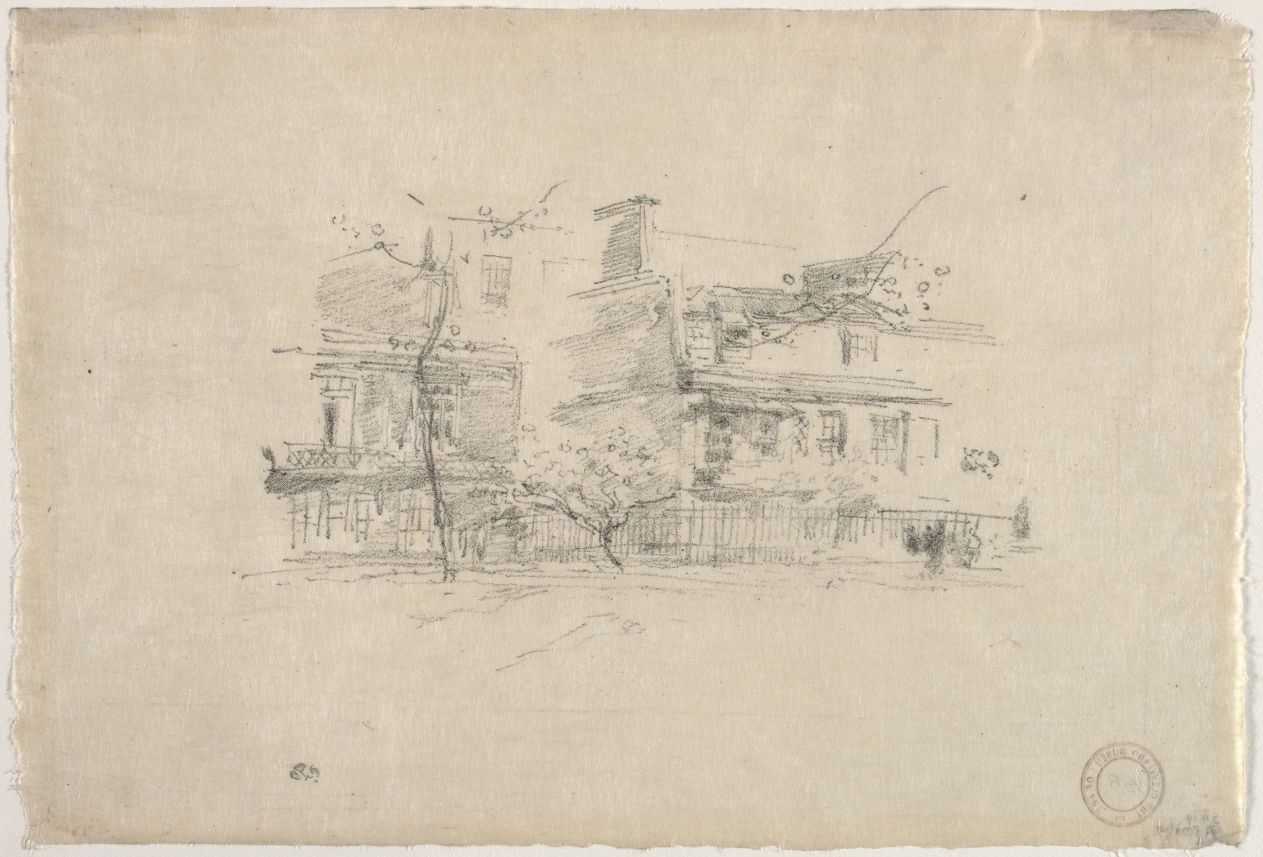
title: Lindsay Row, Chelsea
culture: America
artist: James McNeill Whistler (American, 1834–1903)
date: 1888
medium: lithograph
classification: Print